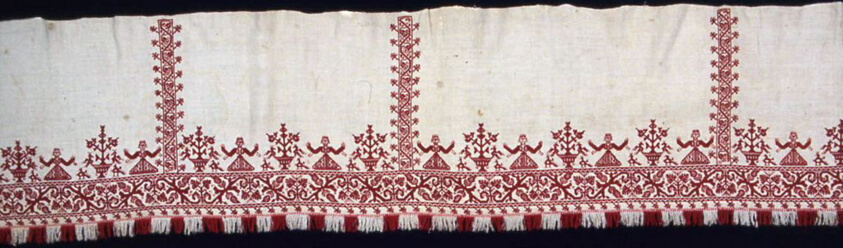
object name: Textile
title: Valance (For a Bed)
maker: Greece, Cyclades Islands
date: 18th century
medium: Linen, plain weave; embroidered with silk in double running cross, and long-armed cross stitches; edged with cotton, plain weave with extended weft-cut fringe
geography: Cyclades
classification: textile; needlework (visual works)